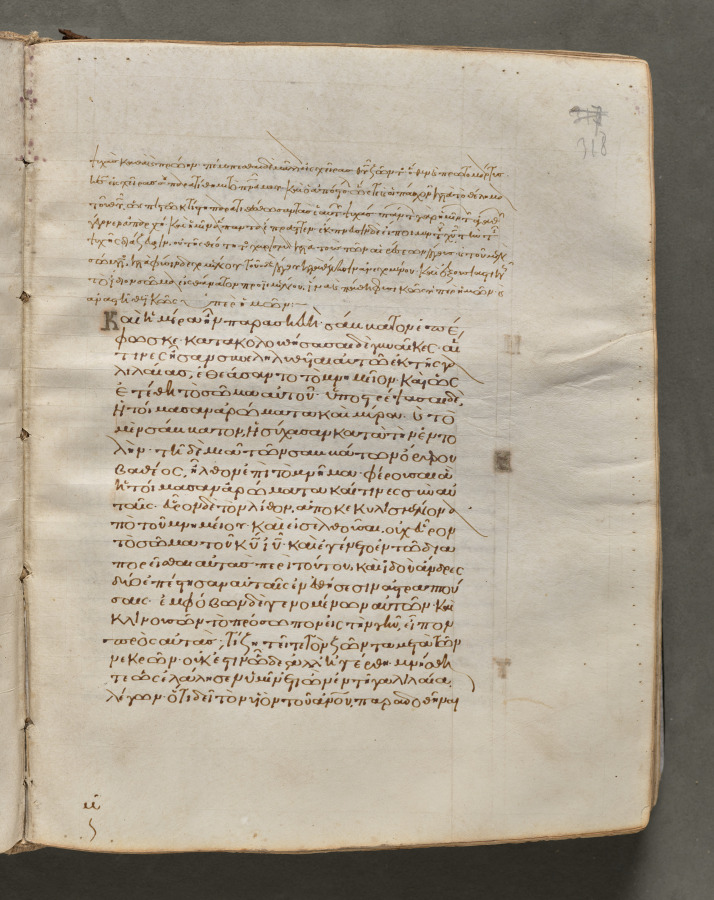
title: Text, folio 318 (recto), from a Gospel Book with Commentaries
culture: Byzantium, Constantinople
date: c. 1000–1100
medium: ink, tempera, and gold on vellum; leather binding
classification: Bound Volume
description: Each of the four gospels in this book opens on a page with brilliantly illuminated borders depicting the author of the text as well as birds—principally peacocks, symbols of the immortality of the soul—and fountains, representing the fountain of life and the salvation of the soul. This volume consists of 428 leaves with texts in Greek. Its level of sophistication suggests that it was probably written and decorated in a monastery in Constantinople.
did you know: Gospel books were carried in procession through Byzantine churches.